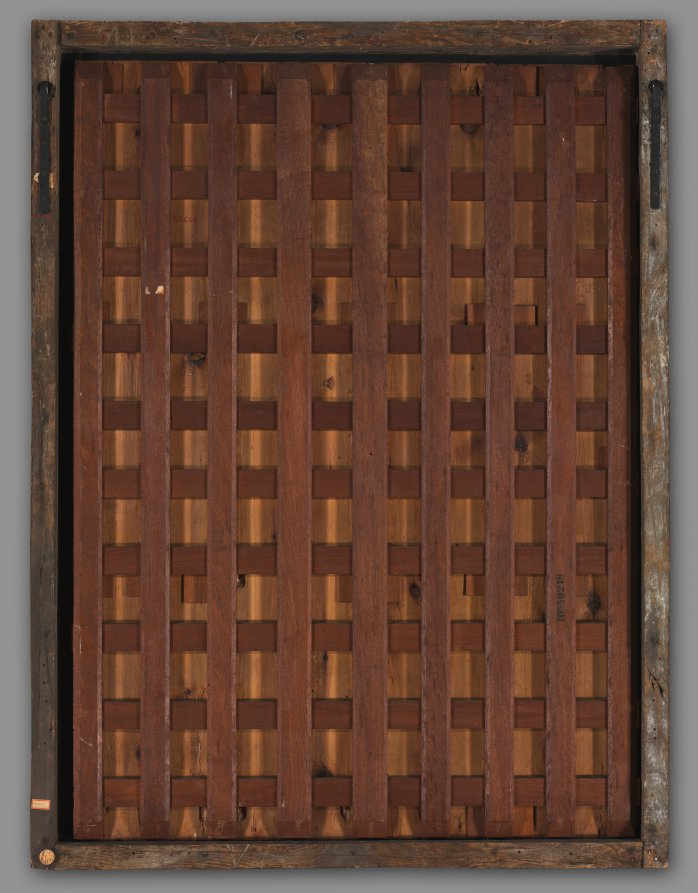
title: The Annunciation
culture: Spain, Catalonia, 15th century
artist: Jaume Ferrer the Younger (Spanish, Catalonia died c. 1460/70)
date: c. 1457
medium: oil, tempera, and gold on wood panel (fir)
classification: Painting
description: This and 1953.660.2 are believed to be the remaining components of a six-panel altarpiece. The large central panel is now preserved in Barcelona (Museu National d’Art de Catalunya). Ferrer collaborated with the painter Pere Garcia de Benavarri on this commission. Spanish works like these often feature elaborate treatment of the gold background, evident here in the exuberant raised decoration (called pastiglia) in the skies and the haloes, as well as other details. Here the archangel Gabriel proclaims the Virgin’s destiny as the mother of Christ. The setting is an ordinary house, but simple objects have symbolic meaning. The lilies represent the Virgin’s purity; the covered jar and water carafe symbolize inviolability; the pomegranate symbolizes Christ’s resurrection, while the apple alludes to humankind’s fall from grace. The towel and basin hint at ritual cleansing during Mass. The blown-out candle points to the arrival of divine light in the world. The two books, closed and open, refer respectively to the Old and New Testaments: one foretelling and the other fulfilling the promise of the messiah.